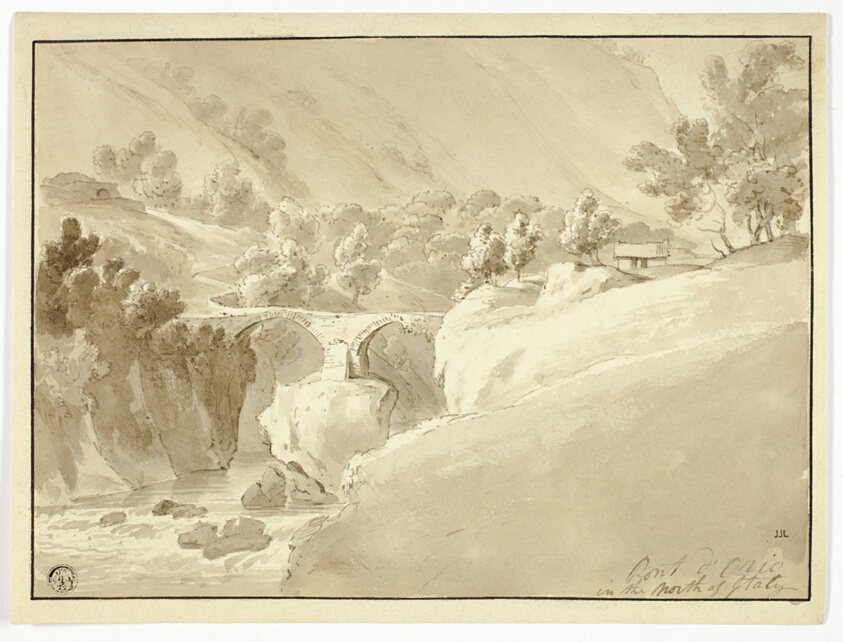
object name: Drawing and Watercolor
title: Pont d'Orio in the North of Italy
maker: Unknown Artist (British, 18th-19th centuries); or possibly Joseph Mallord William Turner (English, 1775-1851)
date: c. 1800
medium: Pen and brown ink, with brush and brown and gray wash, over traces of graphite, on cream wove paper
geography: United Kingdom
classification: ink or chalk wash; drawings (visual works); prints and drawing